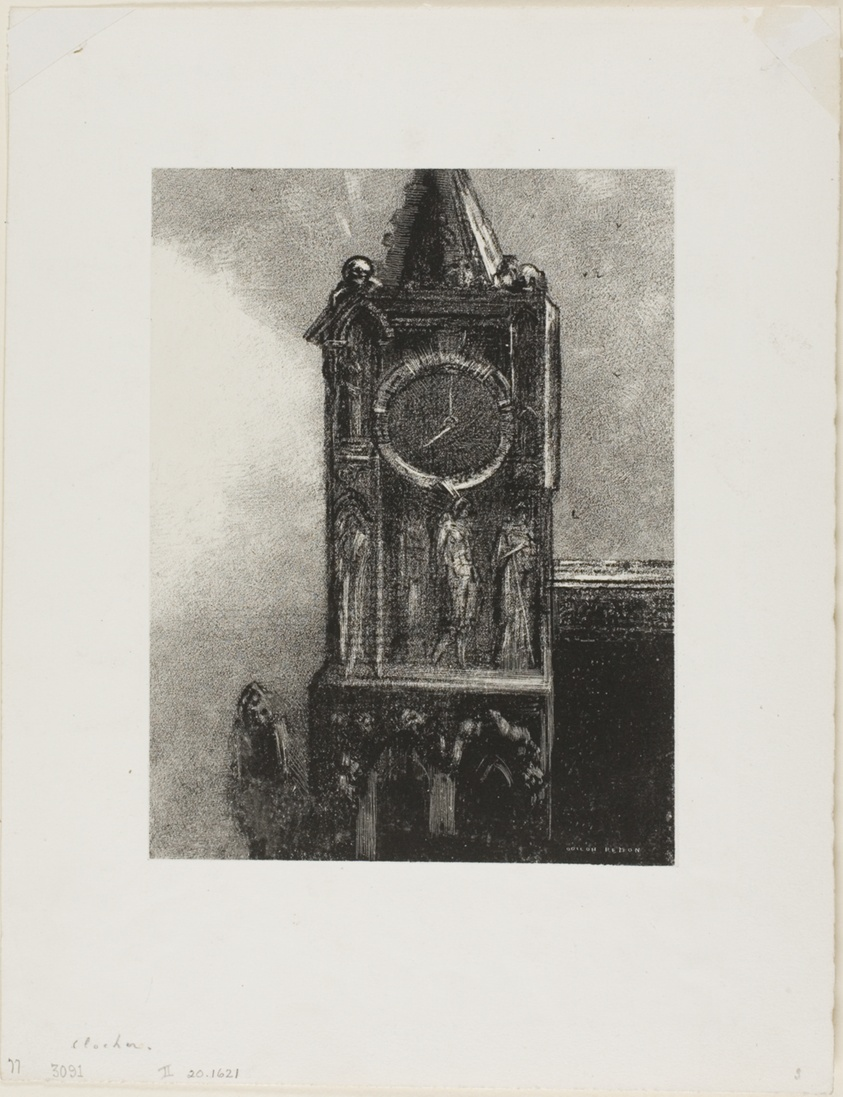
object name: Print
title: A Bell in the Tower Was Ringing the Hour, plate 4 from Edmond Picard's Le Jure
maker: Odilon Redon (French, 1840-1916)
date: 1887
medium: Lithograph in black on ivory China paper laid down on white wove paper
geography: France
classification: lithograph; print; prints and drawing; paper